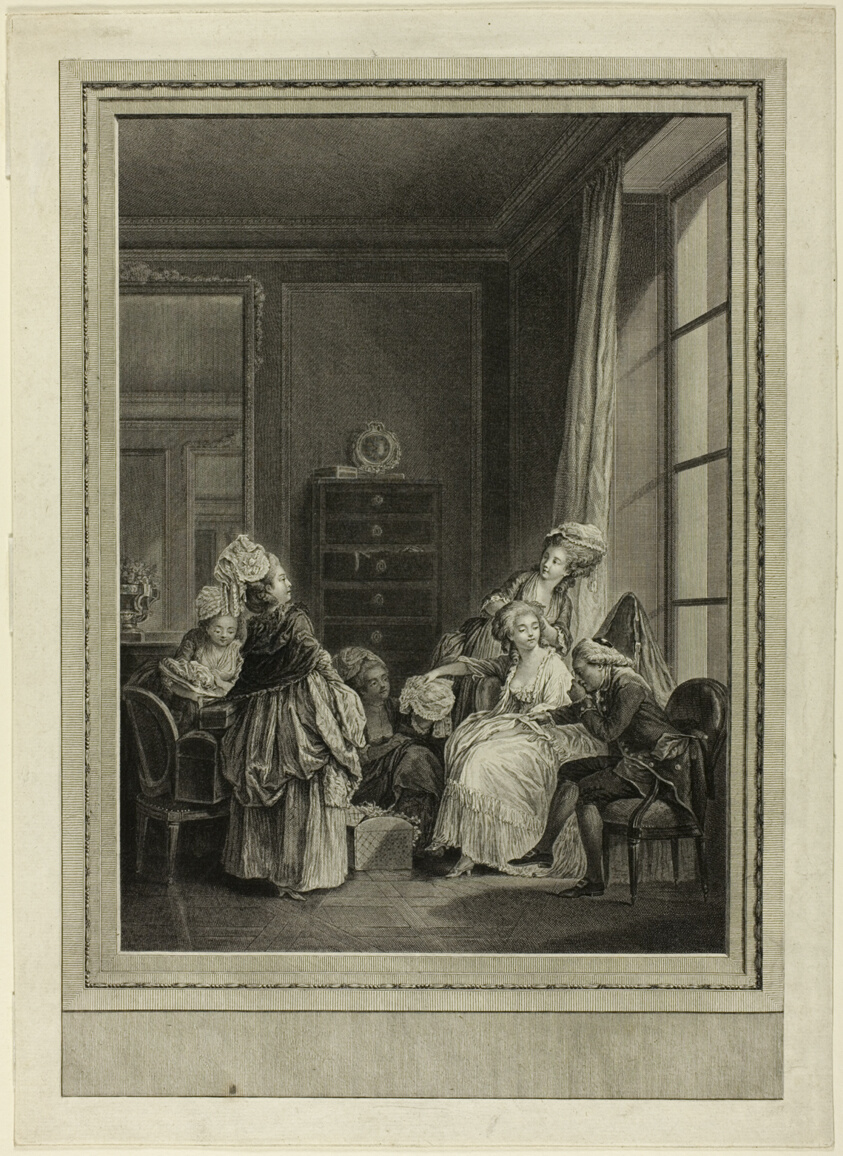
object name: Print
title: The Director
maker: Nicolas-Joseph Voyez; French, 1742-1806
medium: Etching and engraving in black on ivory laid paper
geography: France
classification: etching; print; prints and drawing